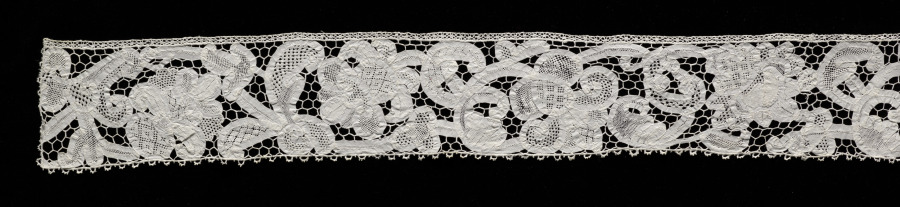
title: Lace Edging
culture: Italy, Genoa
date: 1700s–1800s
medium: Linen: needle lace and bobbin lace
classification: Lace